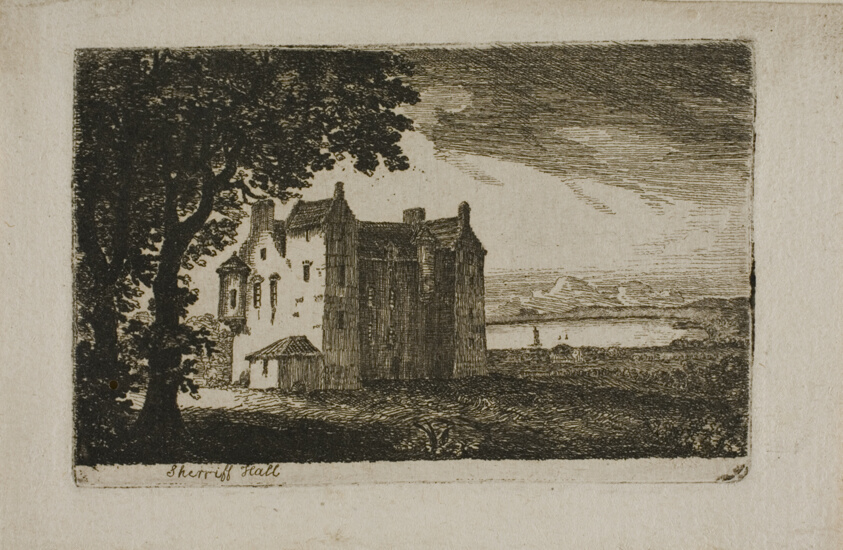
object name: Print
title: Sheriff Hall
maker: John Clerk of Eldin (Scottish, 1728-1812)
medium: Etching on paper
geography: Scotland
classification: etching; print; prints and drawing